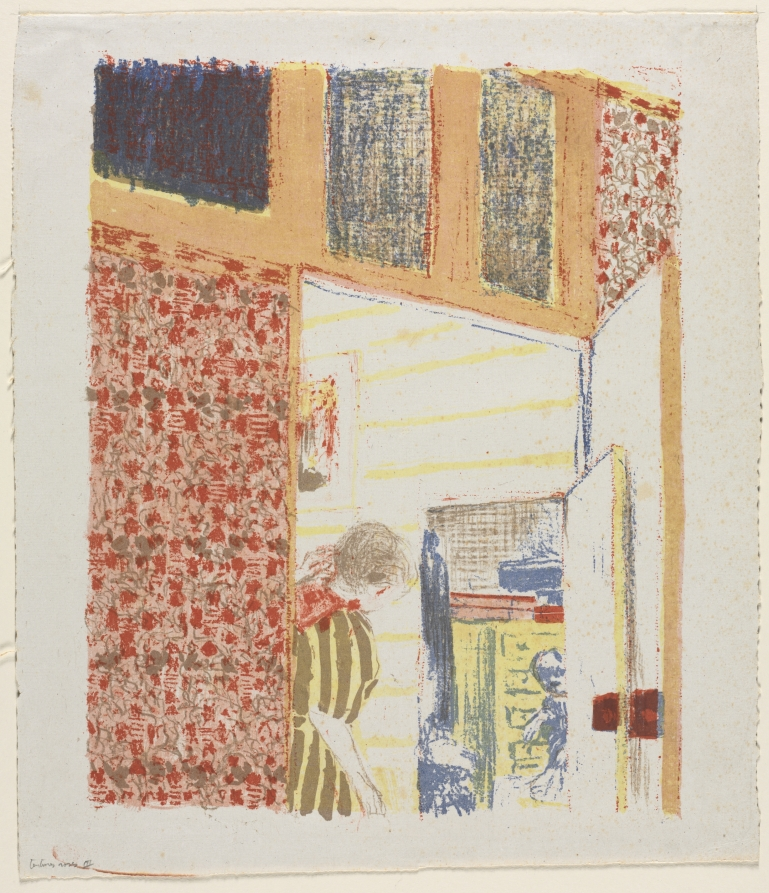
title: Interior with Pink Wallpaper III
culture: France, 19th century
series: Landscapes and Interiors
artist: Édouard Vuillard (French, 1868–1940)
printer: Auguste Clot (French, 1858–1936)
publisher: Ambroise Vollard (French, 1867–1939)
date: 1899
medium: color lithograph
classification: Print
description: The optical beauty of the patterning and luscious color of Interior with Wallpaper I, II, and III distracts from their ambivalent undercurrents. Across the three sheets, Vuillard creates an airless enclosure in which the wallpaper replicates itself, metastasizing across the surface and threatening the figures partially glimpsed through interior doors. Hidden figures recur in Vuillard’s work, adding an element of the uncanny to familiar settings.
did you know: Pattern and textile are paramount in Vuillard’s interiors, likely inspired by the many fabrics he would have encountered within his seamstress mother’s domestic atelier.